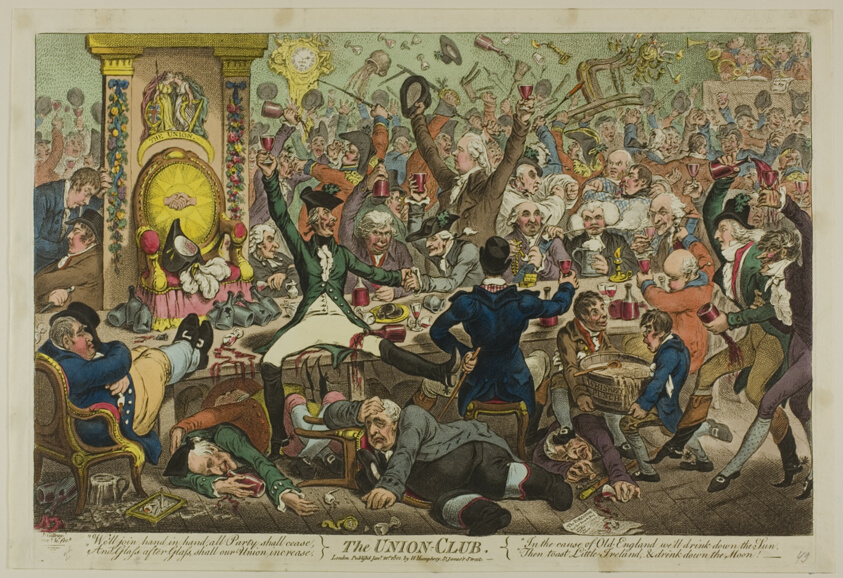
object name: Print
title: The Union Club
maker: James Gillray (English, 1756-1815); published by Hannah Humphrey (English, c. 1745-1818)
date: published January 21, 1801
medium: Hand-colored etching on paper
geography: England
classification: etching; print; prints and drawing